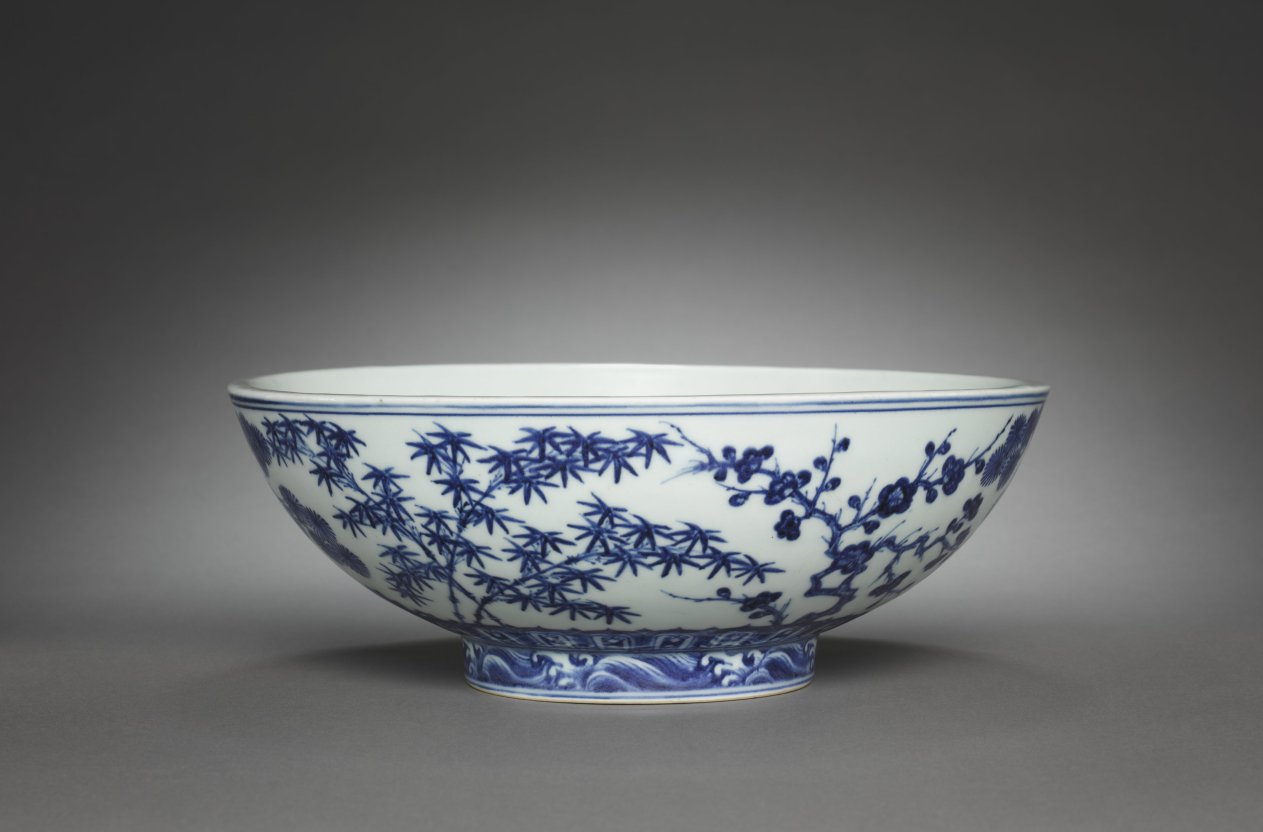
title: Bowl with Decoration of the "Three Friends"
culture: China, Jiangxi province, Jingdezhen, Ming dynasty (1368-1644), Xuande mark and reign (1426-1435)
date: 1426–35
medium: porcelain with underglaze blue decoration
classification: Ceramic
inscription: 大明宣德年製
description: Pine, bamboo, and plum blossom are known as the “Three Friends” of winter as metaphors of the scholar-gentleman’s ideal of integrity, endurance, loftiness, and purity.